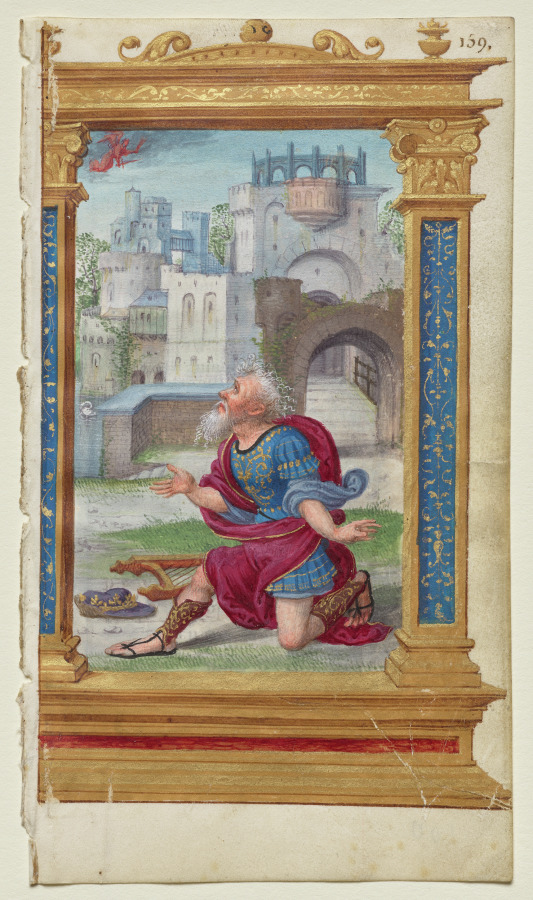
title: Leaf from a Book of Hours: King David in Prayer (2 of 3 Excised Leaves)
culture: France, 16th century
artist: Noël Bellemare (French, d. 1546)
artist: The 1520s Hours Workshop (French)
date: c. 1530–35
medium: ink, tempera and liquid gold on vellum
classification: Manuscript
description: The 1520s Hours Workshop produced luxury books of hours for a wealthy, often royal, clientele. Recent evidence points to Paris as the site of the workshop’s activity under the direction of Antwerp-born miniaturist Noël Bellemare (died 1546). Containing fuschia pinks and bright acid greens, the palette is unusual in French manuscript painting of the period. Instead, Bellemare’s miniatures point directly to Antwerp painting at the time.